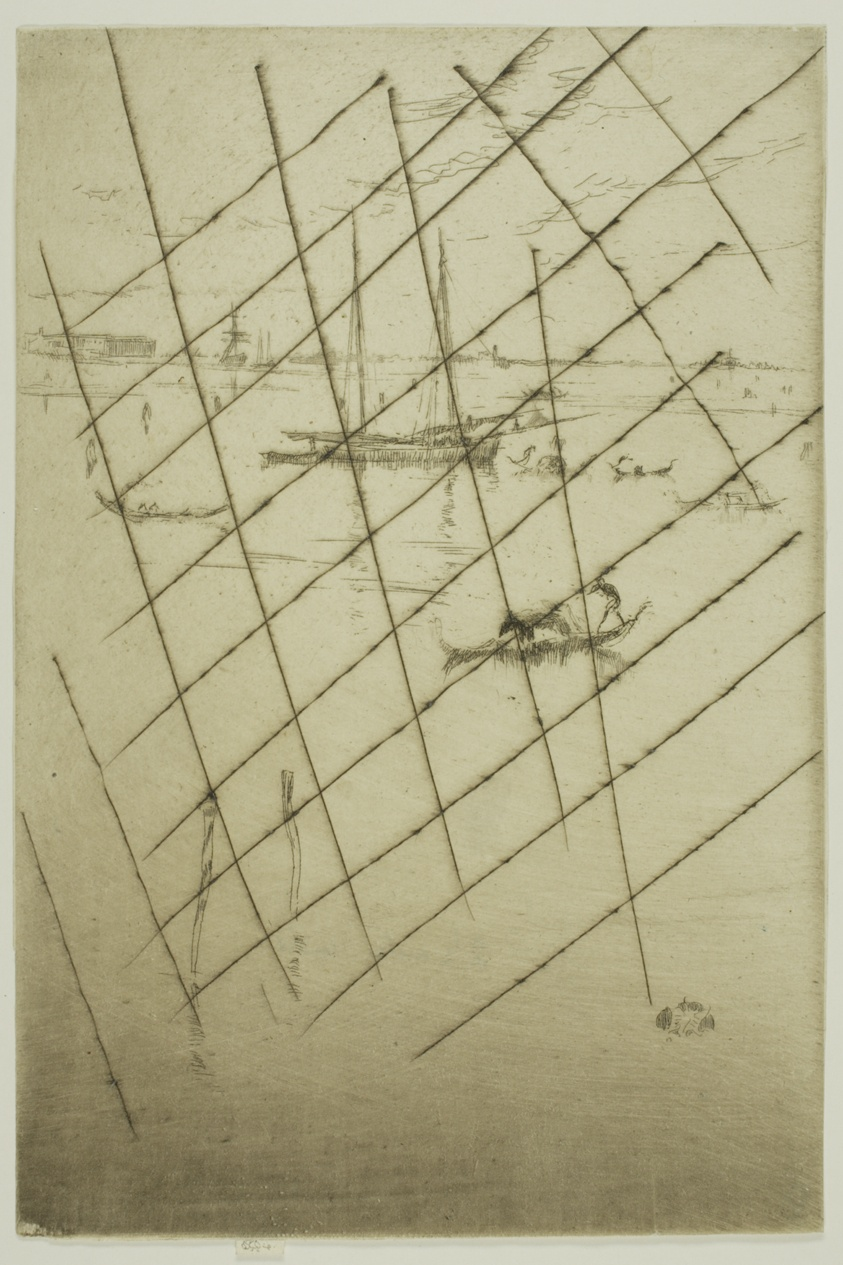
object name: Print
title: The Little Lagoon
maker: James McNeill Whistler (American, 1834-1903)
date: 1879/80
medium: Etching, with drypoint cancellation, in dark brown ink on ivory laid paper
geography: United States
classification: etching; print; prints and drawing; drypoint; paper